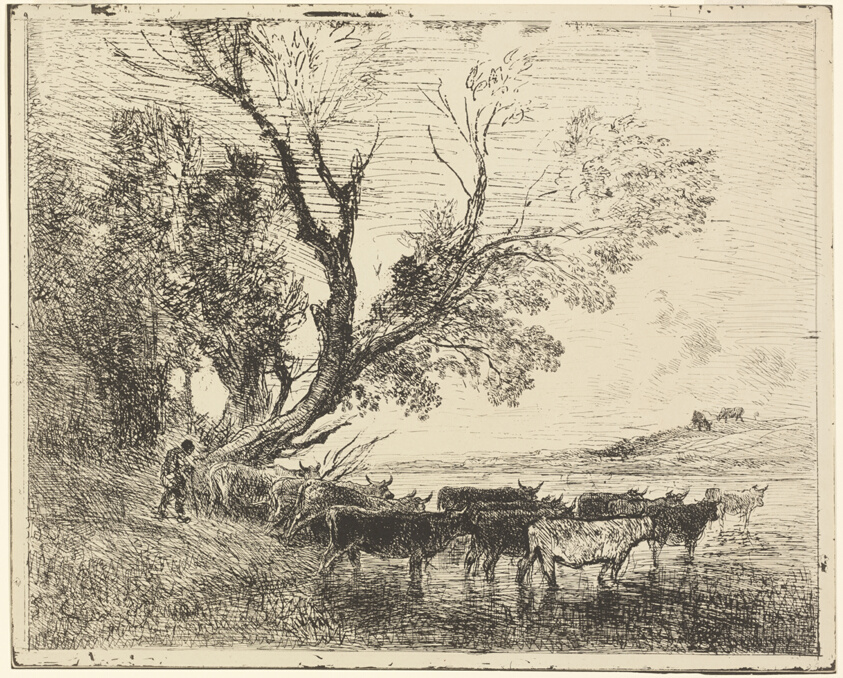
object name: Print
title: The Ford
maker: Charles François Daubigny (French, 1817-1878)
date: 1862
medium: Cliché-verre on ivory photographic paper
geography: France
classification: cliché-verre; print; prints and drawing